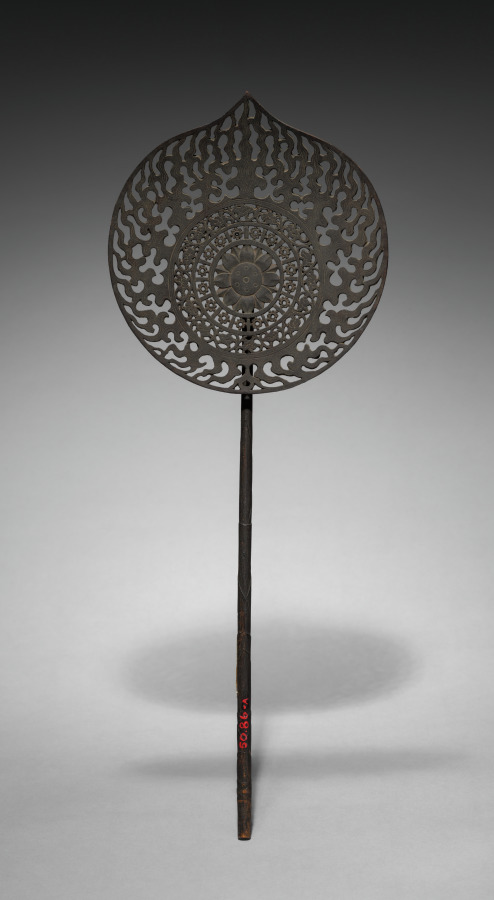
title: Halo for Buddha of the Future (Miroku Bosatsu)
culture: Japan, Asuka period (538–710)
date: late 600s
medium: cast bronze, incised, with traces of gilding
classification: Sculpture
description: Buddhism was introduced to Japan in the sixth century. For early Japanese devotees, Buddhism offered the promise of salvation through faith in the Buddha of the Future, who would appear at the end of the world. The concept of eternal salvation held particular resonance with the Japanese aristocracy, who became the staunchest supporters of this new faith. Small sculptures like this one, with its gentle grace and powerful presence, were popular devotional objects.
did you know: The Sanskrit name of this being, Maitreya, derives from the Sanskrit word for friend, mita.